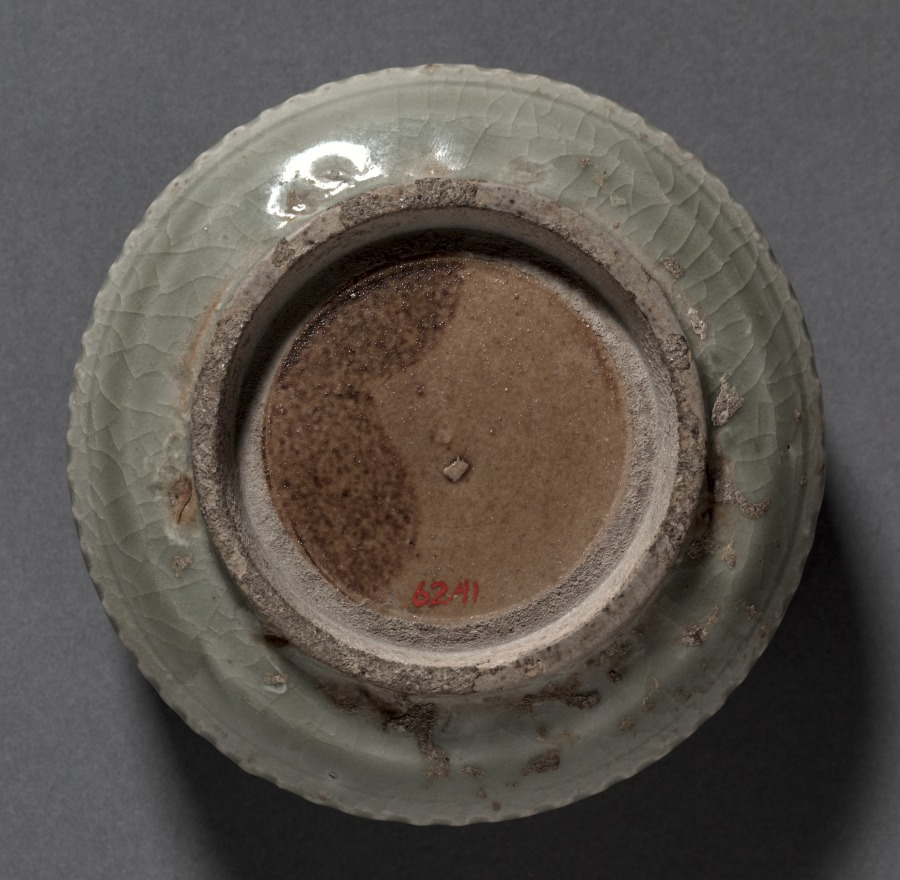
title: Covered Box with Carved Floral Design: Yaozhou Ware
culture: China, Shanxi province, Northern Song dynasty (960-1127)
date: 1100s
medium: glazed stoneware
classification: Ceramic